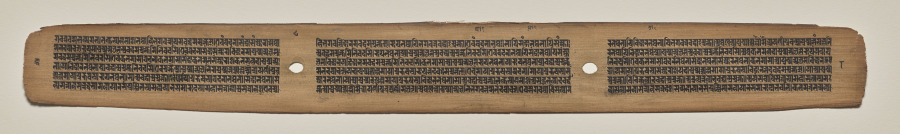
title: Text, Folio 8 (verso), from a Manuscript of the Perfection of Wisdom in Eight Thousand Lines (Ashtasahasrika Prajnaparamita-sutra)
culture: Eastern India, Bihar, Vikramashila Monastery. Painting: Nepal, Kathmandu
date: Sunday, September 14, 1119 (year 239 of the Newar Samvat in the month of Ashvina)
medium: ink and color on palm leaf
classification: Painting